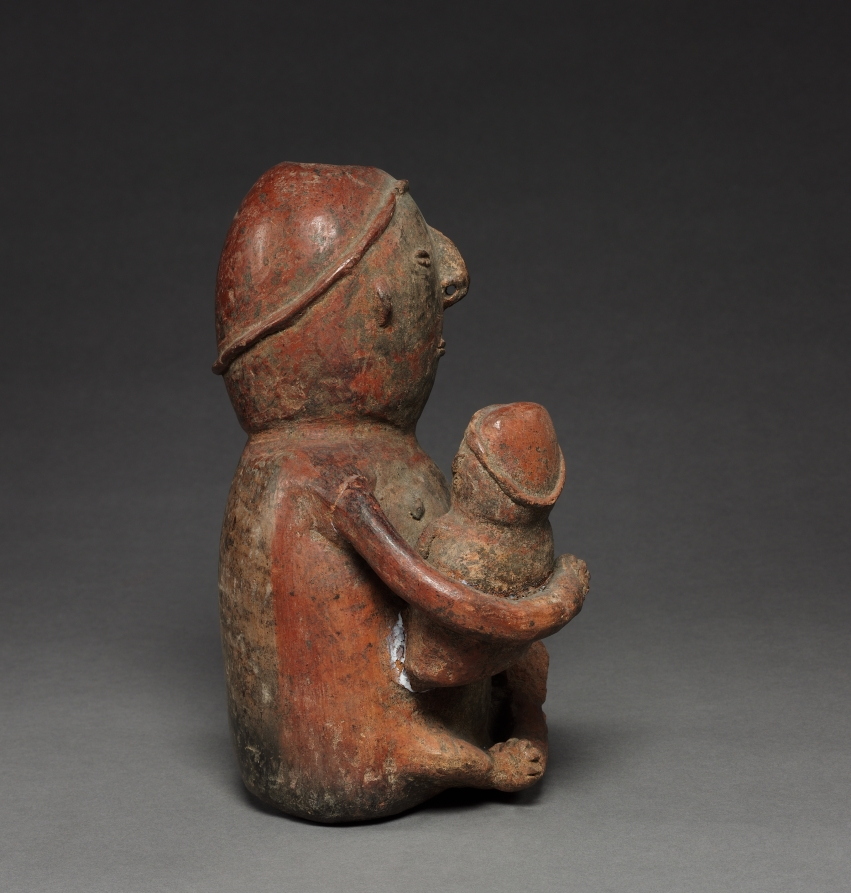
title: Figures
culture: Colombia, 18th-19th century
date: before 1921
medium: red ware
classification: Ceramic